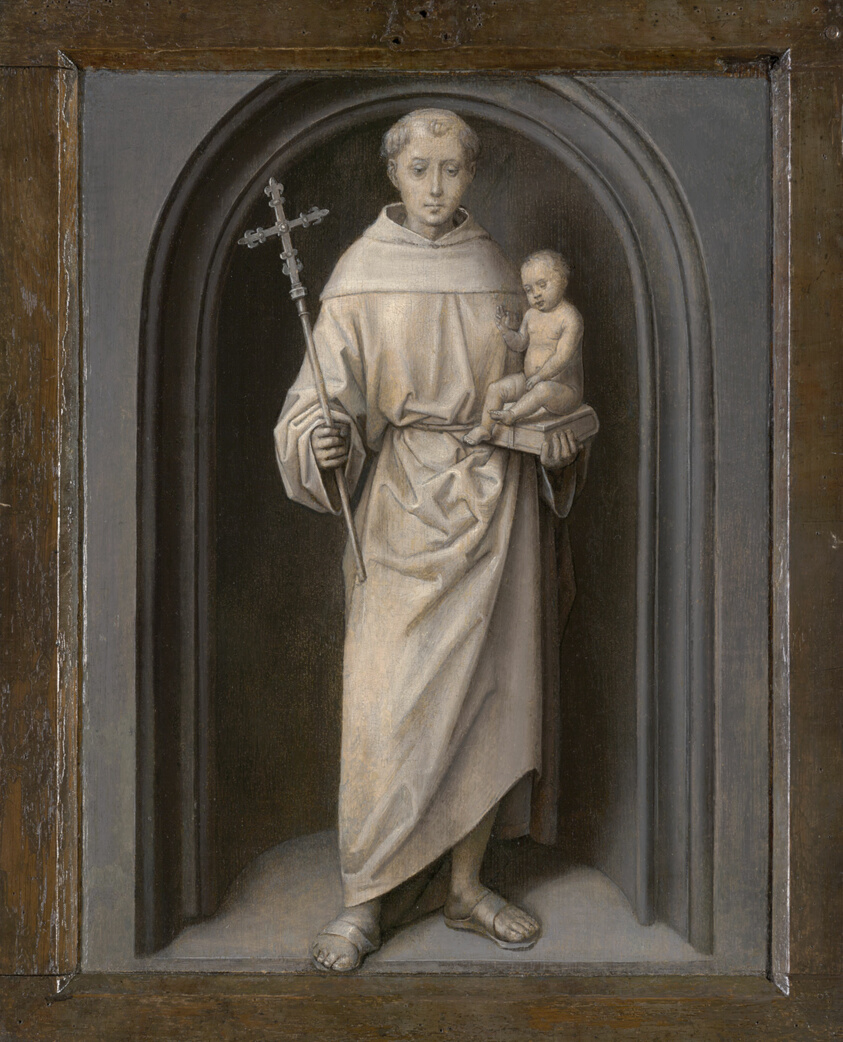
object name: Painting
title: Saint Anthony of Padua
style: 15th century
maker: Hans Memling (Netherlandish, c. 1430–1494)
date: c. 1485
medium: Oil on panel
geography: Netherlands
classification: painting; paint; oil paintings (visual works); oil on panel; european painting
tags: saints, man, cross, babies, children, religion, religious, religious figures, Devotion, bibles, book, Christian subjects, Christianity, religious attire, Jesus, prayer, interior, vase, river, landscape, window